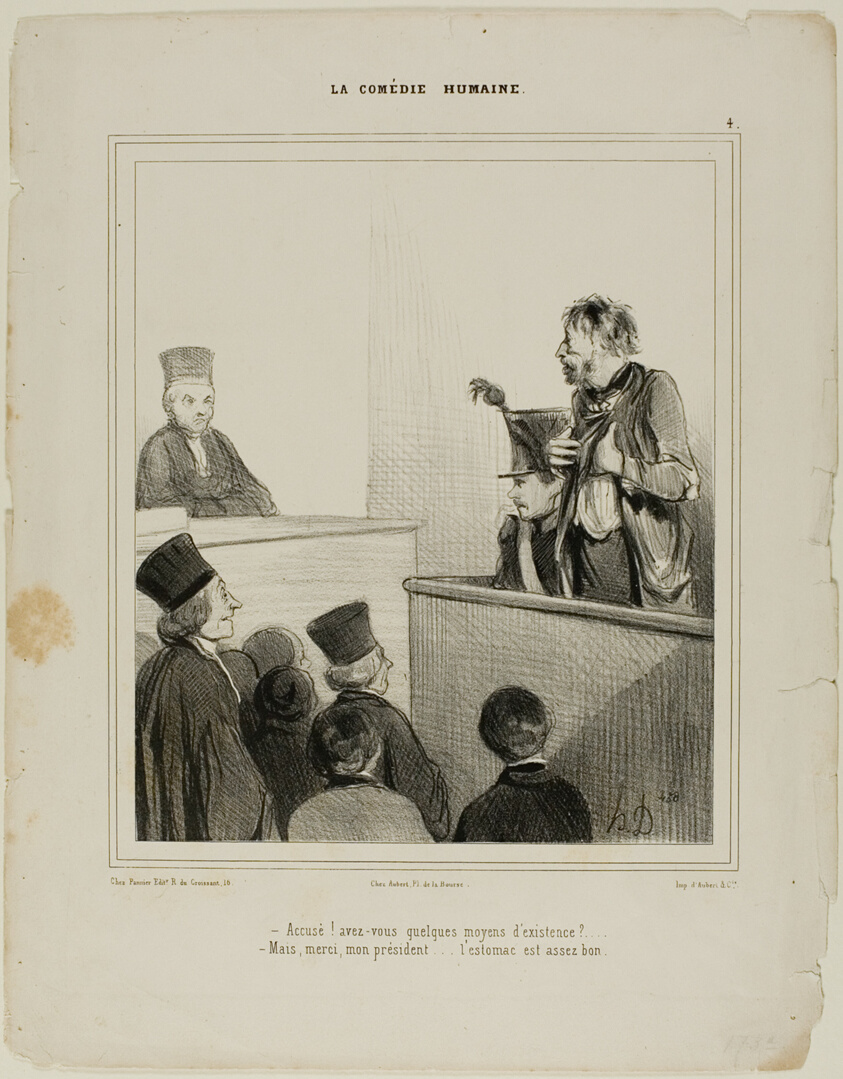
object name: Print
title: “- Defendant! Do you have any means of living? - Thank you Mr President.... I have quite a good stomach,” plate 4 La Comédie Humaine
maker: Honoré Victorin Daumier; French, 1808-1879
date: 1843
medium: Lithograph in black on ivory wove paper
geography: France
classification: lithograph; print; prints and drawing